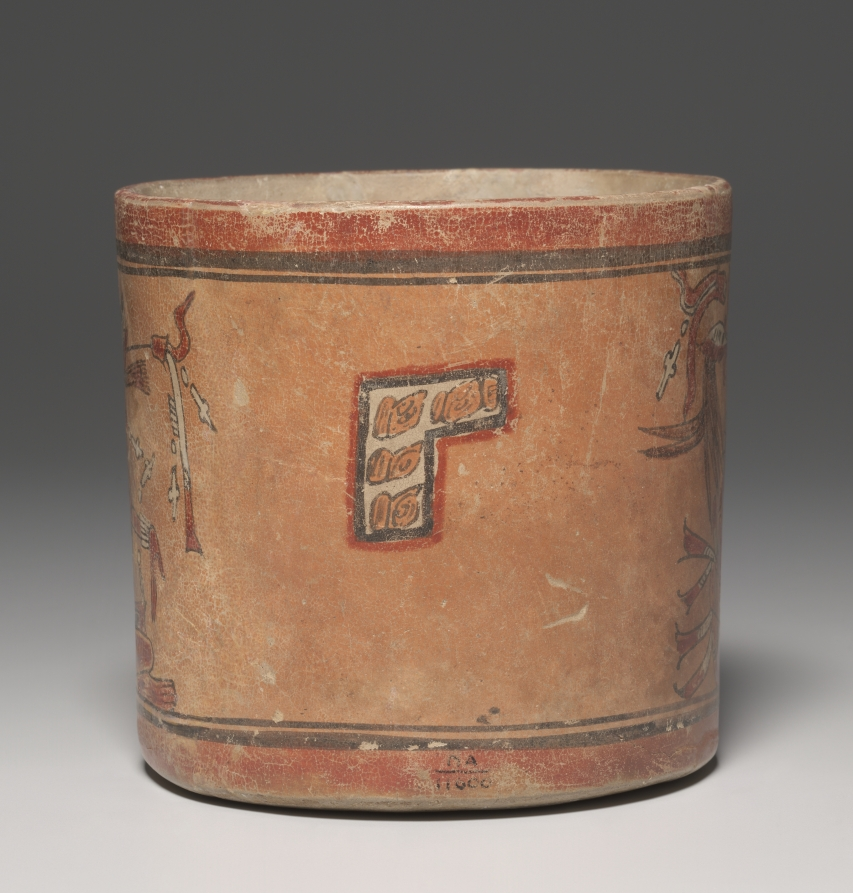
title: Cylinder Vessel with Deities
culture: Guatemala, Kixpek, Maya (Chamá) style (250-900)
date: 600–900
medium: earthenware with colored slips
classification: Ceramic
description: Between AD 600 and 900, Maya cities and towns mushroomed in number, interacted, and competed. Since a distinctive ceramic painting style was part of many centers' identities, the number of styles exploded and painted pottery became a hallmark of the era. This vessel, painted with a ruler's patron deity (God K), is of a style produced briefly in one area of Guatemala's Chamá Valley.